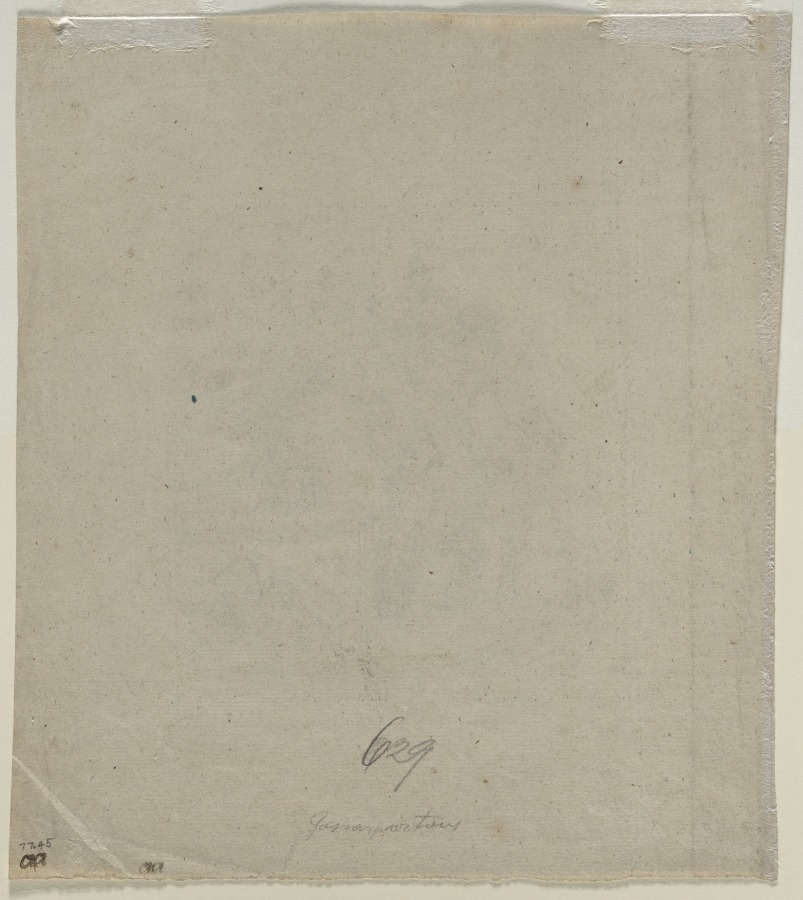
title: The King of Thule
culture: Germany, 19th century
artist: Moritz von Schwind (German, 1804–1871)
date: second or third quarter 1800s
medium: graphite; squared in graphite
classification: Drawing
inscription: signed, lower left, in graphite: M. v. Schwind [underlined] ; by artist, upper right, in graphite: 18 ; by artist, lower right, in graphite: 20 ; lower right, in graphite: 20 [underlined] ; VERSO, lower center, in graphite: 629 ; lower center, in graphite: Passonpartous